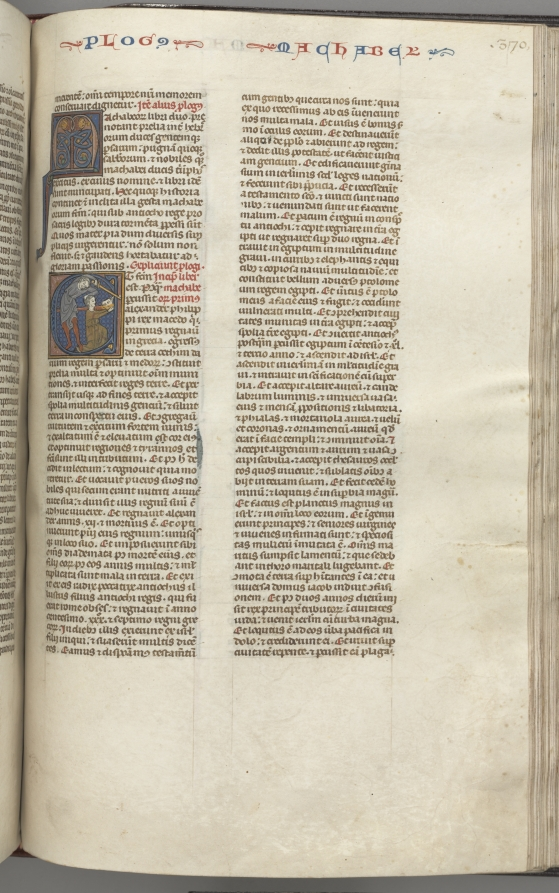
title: Fol. 370r, Maccabees I, historiated initial E, Mathathias slaying the idolatrous Jew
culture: Southern France, Toulouse(?), 13th century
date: c. 1275–1300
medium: ink, tempera and gold on vellum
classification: Bound Volume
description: Biblical manuscripts were highly prized and important possessions of churches, monasteries, cathedral schools, and universities throughout medieval Europe. The biblical texts were known as the vulgate, the translations made by Saint Jerome in the fourth century from Hebrew and Greek into Latin, which became the definitive and official Latin version of the Roman Church. In the 13th century, the bible was, for the first time, produced as a single volume with an officially sanctioned sequence to its books and chapters as illustrated by this example. The very extensive decoration of this bible is arranged hierarchically to indicate the relative importance of the various texts so that full or almost full-page initials mark the openings of the first prologue, Genesis, and the first Gospel; historiated initials mark the beginning of each book and illuminated initials mark the Prologues.